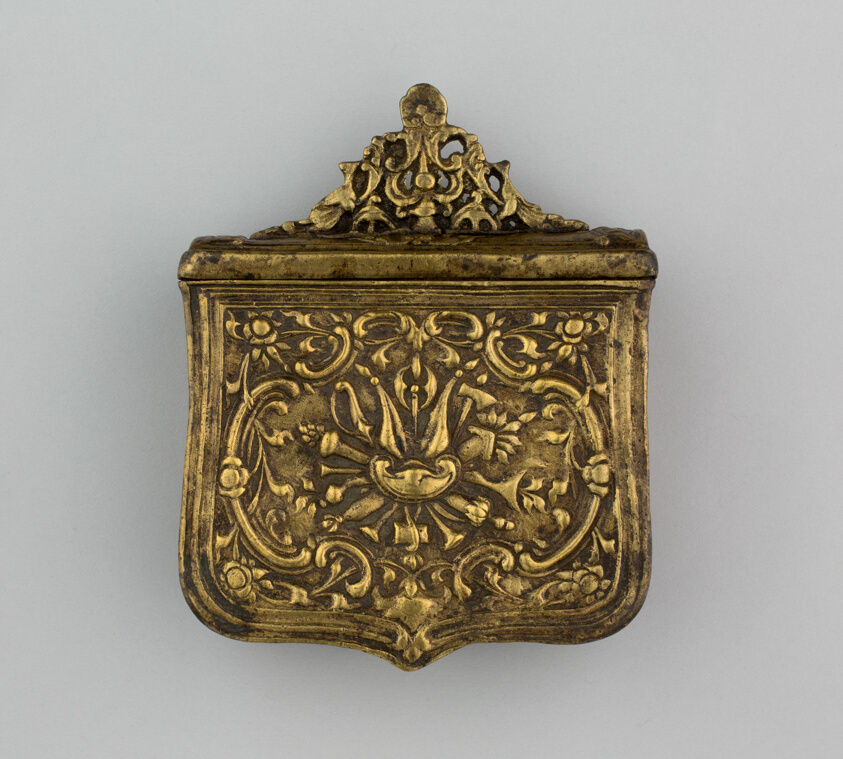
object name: Arms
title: Cartridge Box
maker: German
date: late 17th century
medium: Brass, cast and chiseled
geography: Germany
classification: firearm-accessory; arms; arms and armor